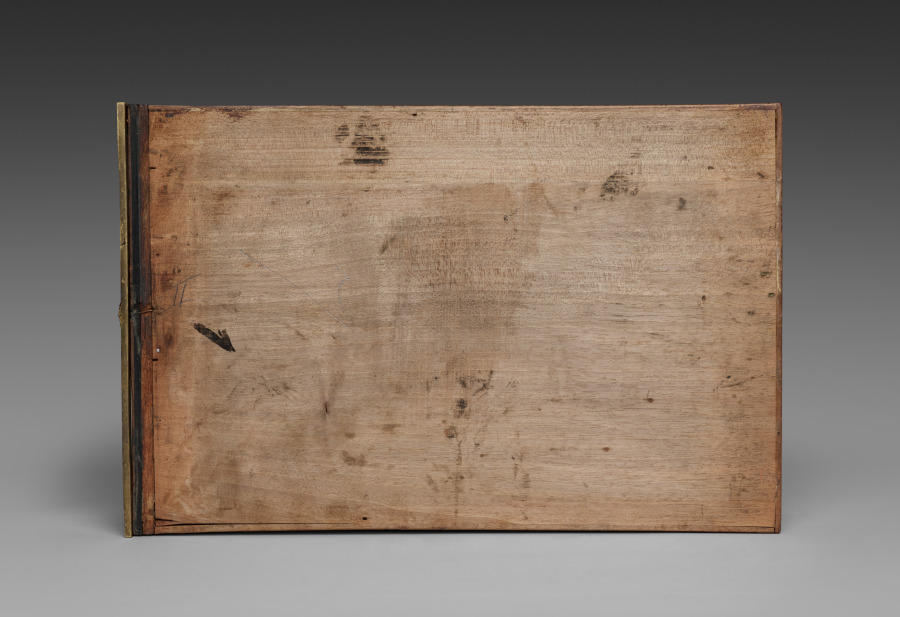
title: Side Drawer for Cabinet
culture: France, late 17th Century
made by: André-Charles Boulle (French, 1642–1732)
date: c. 1690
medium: ebony, marquetry in metal and tortoise shell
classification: Furniture and woodwork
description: Appointed cabinetmaker to King Louis XIV in 1672, André-Charles Boulle became a master of furniture making in France during the late 1600s until his death in 1732. Known primarily for his use of marquetry, in which metal patterns are inlaid into tortoiseshell then applied within the veneered surface of the furniture, Boulle established a level of quality and craftsmanship few others could achieve. As a result, his work found favor at the royal court and among other aristocrats and diplomats eager to impress the king. The inclusion of a medallion depicting Louis XIV within the bronze decoration of this chest would have identified the owner with the royal court. Often exhibiting stout architectural proportions with elegant groups of inlaid motifs such as the parrot on the central panel of this chest, Boulle’s designs are an example of the intellectual fashion for contrasting ideas, materials, and motifs.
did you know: Originally designed to sit atop an elaborate tall stand, this chest was likely altered in the late 1700s to reduce its scale and height.